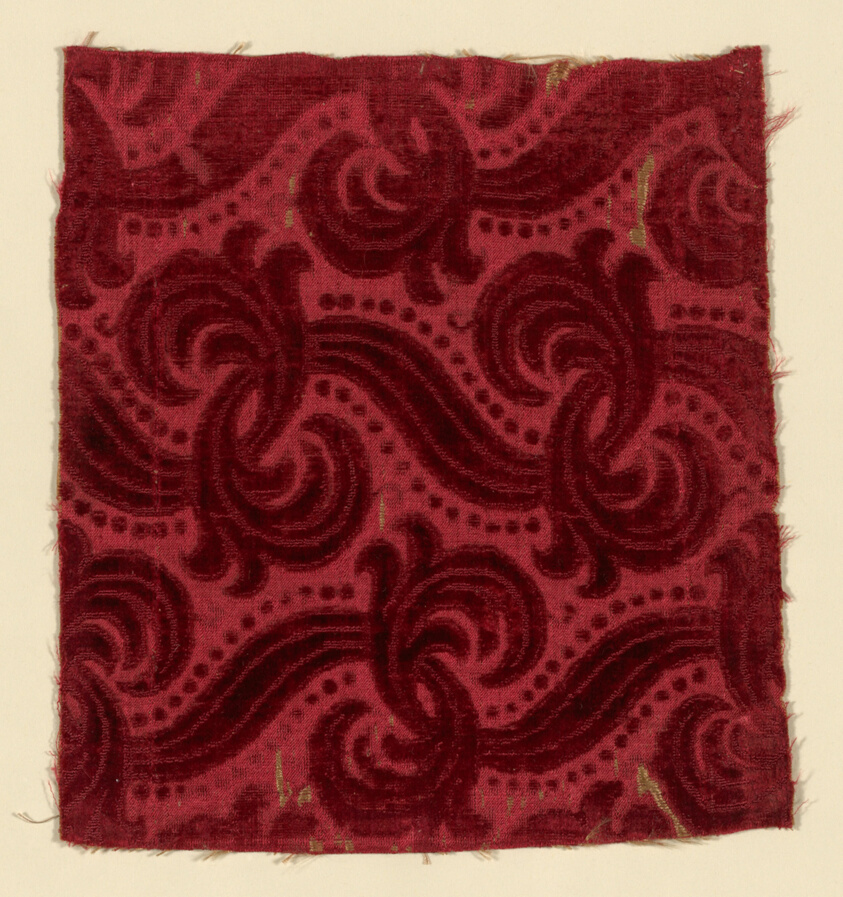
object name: Textile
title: Fragment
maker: Italy or France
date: c. 1600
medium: Silk, warp-float faced satin weave with supplementary binding wefts and supplementary pile warps forming cut, uncut, and voided velvet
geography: Italy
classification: textile; weaving - velvet; weaving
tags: fashion